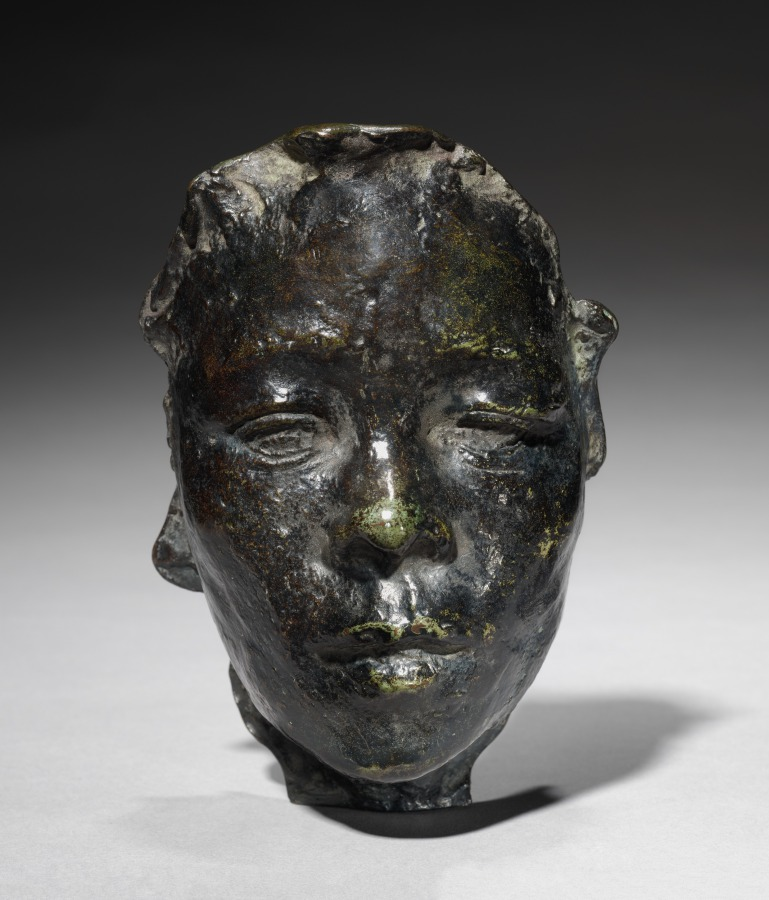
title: Mask of the Japanese Actress Hanako (Ohta Hisa)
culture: France, early 20th Century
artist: Auguste Rodin (French, 1840–1917)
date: 1908 (?)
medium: bronze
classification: Sculpture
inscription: Signed sinister side of neck: "A. Rodin"; inside sinister side in relief: "A. Rodin"